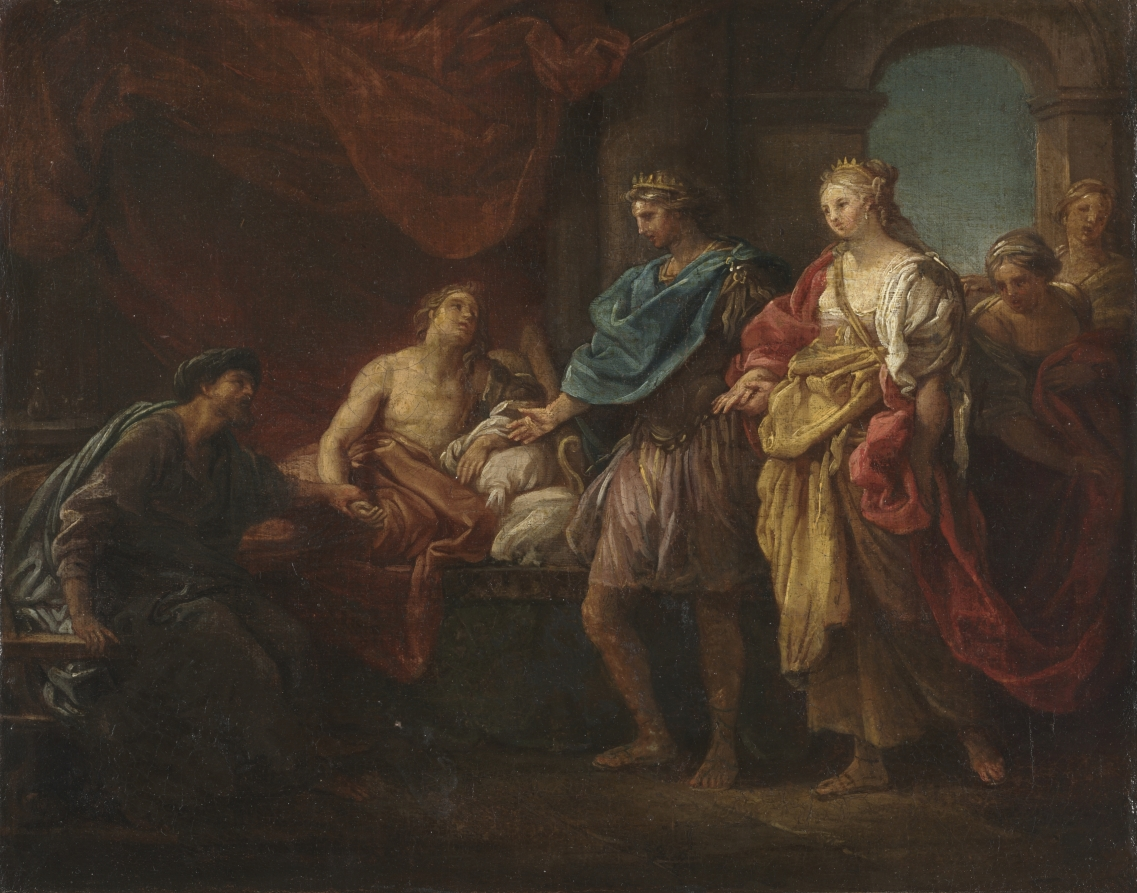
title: Study for "Antiochus and Stratonice"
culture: Italy, 18th century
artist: Pompeo Batoni (Italian, 1708–1787)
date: c. 1746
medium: oil on canvas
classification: Painting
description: Struck by a mysterious illness, Antiochus lies in bed near death. His grieving father, who has recently taken Stratonice as his wife, summons a doctor. Noticing that the sight of the young woman quickens Antiochus’s pulse and that passion causes his sickness, the doctor describes the youth’s predicament to his father, who selflessly offers Stratonice to his son. The subject, both a love story and an example of parental devotion, enjoyed considerable popularity well into the 1800s.